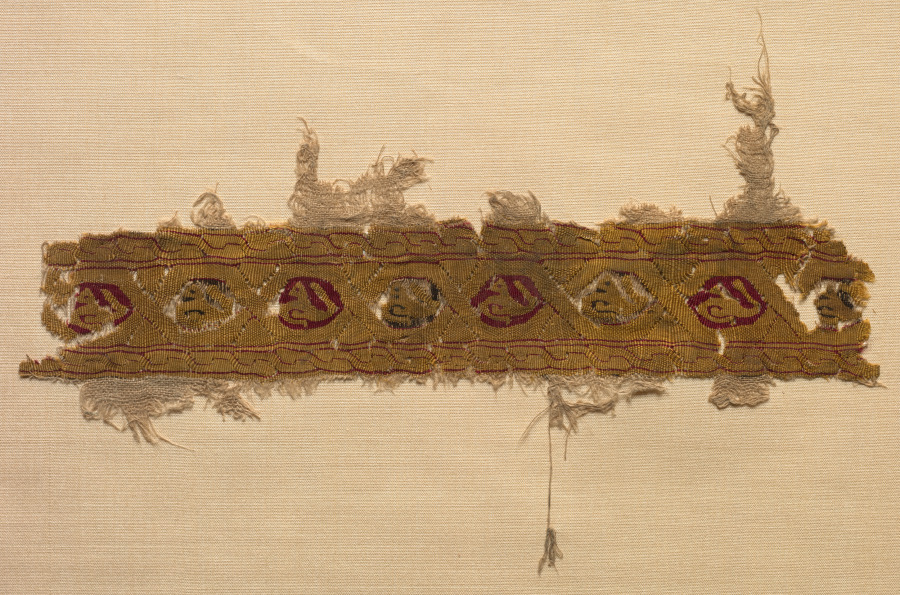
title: Fragment of a Tiraz-Style Textile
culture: Egypt, Fatimid period, Caliphate of al-Hafiz or later, AH 524-565, 12th Century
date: 1130 – 1169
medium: tabby ground with inwoven tapestry ornament; linen and silk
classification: Textile